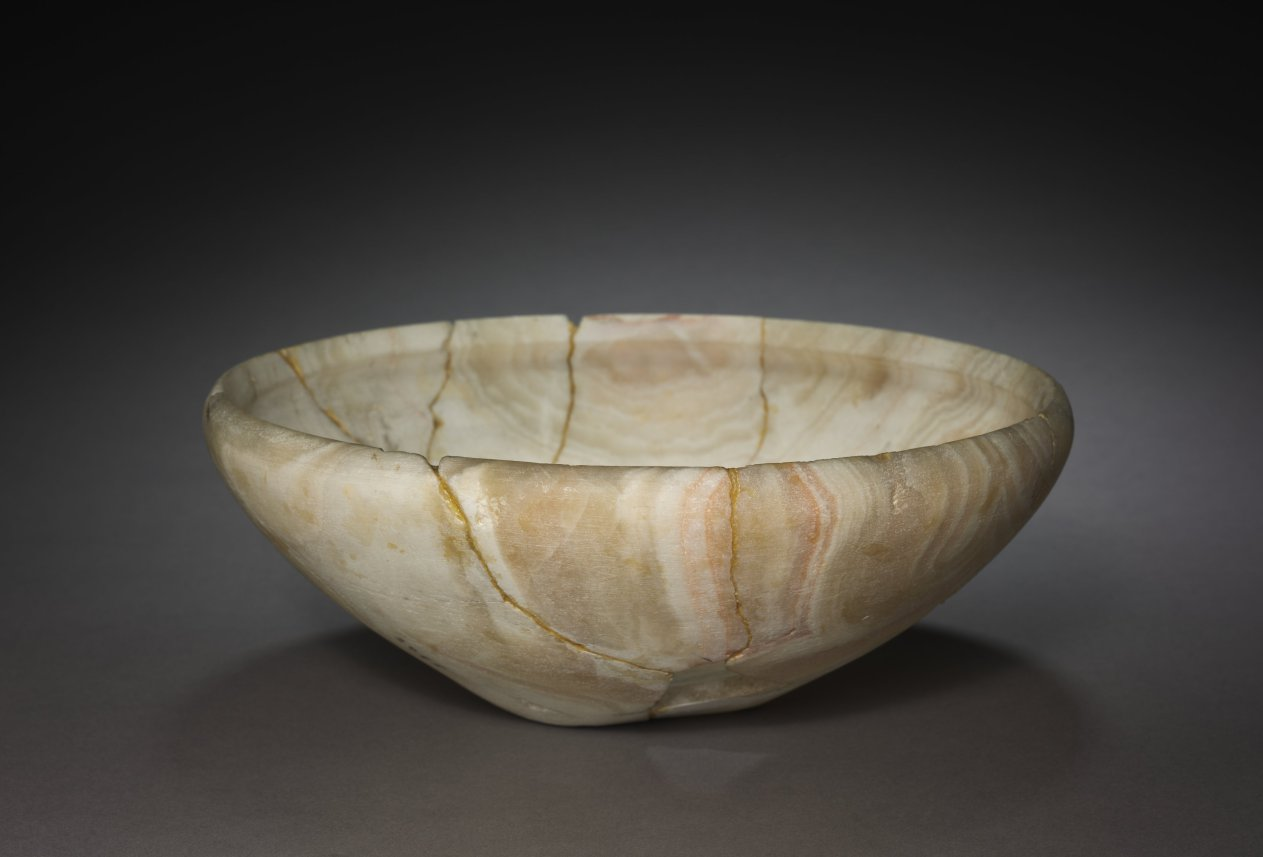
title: Bowl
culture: Egypt, Early Dynastic (2950–2647 BCE), Dynasty 2, reign of Nynetjer (c. 2700 BCE) or later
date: 2770–2647 BCE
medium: travertine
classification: Vessels